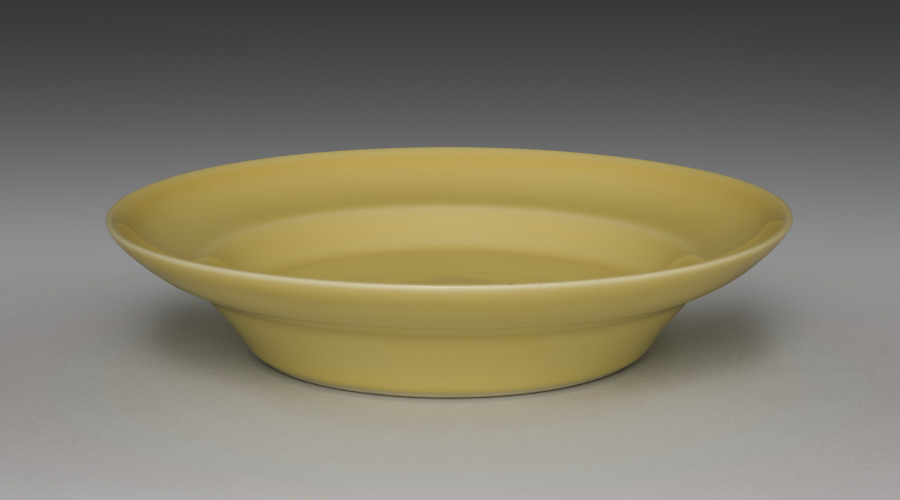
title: Sweets Bowl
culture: Japan, Meiji period (1868–1912)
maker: Seifū Yohei III (Japanese, 1851–1914)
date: 1893–1914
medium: Glazed porcelain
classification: Ceramic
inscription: 清風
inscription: 金聲玉振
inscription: 帝室技芸員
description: Seifū Yohei III was the most prominent head of a ceramics studio in Kyoto that specialized in Chinese-style porcelains and especially items for use in sencha (煎茶), or the drinking of steeped-leaf tea with companions. Sencha was popular among the bunjin of Kyoto and Osaka, who often enjoyed it as part of their emulation of Chinese culture. While sencha was by design less formal than the Japanese tea ceremony, it still featured the display of treasured objects. Prized Chinese antiquities were generally unobtainable, so substitutes such as the Gu-Shaped Flower Vase, CMA 2022.224, were much in demand. Bowls for distributing sweets, like this one, were also a staple of sencha gatherings.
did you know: Names for the glazes, written in ink with a brush on the lids of the custom-made storage boxes for the works, often indicate a specific glaze or ware that had inspired Seifū Yohei III.